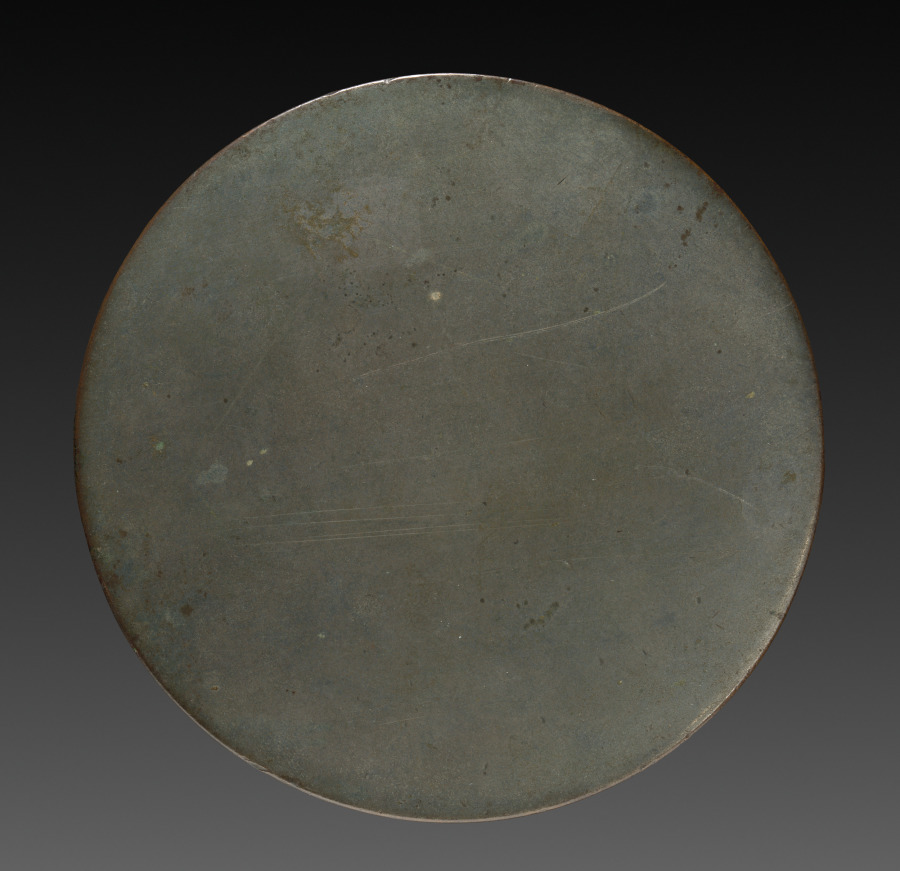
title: Mirror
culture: Japan, Muromachi period (1392–1573)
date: 1392–1573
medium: bronze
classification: Metalwork